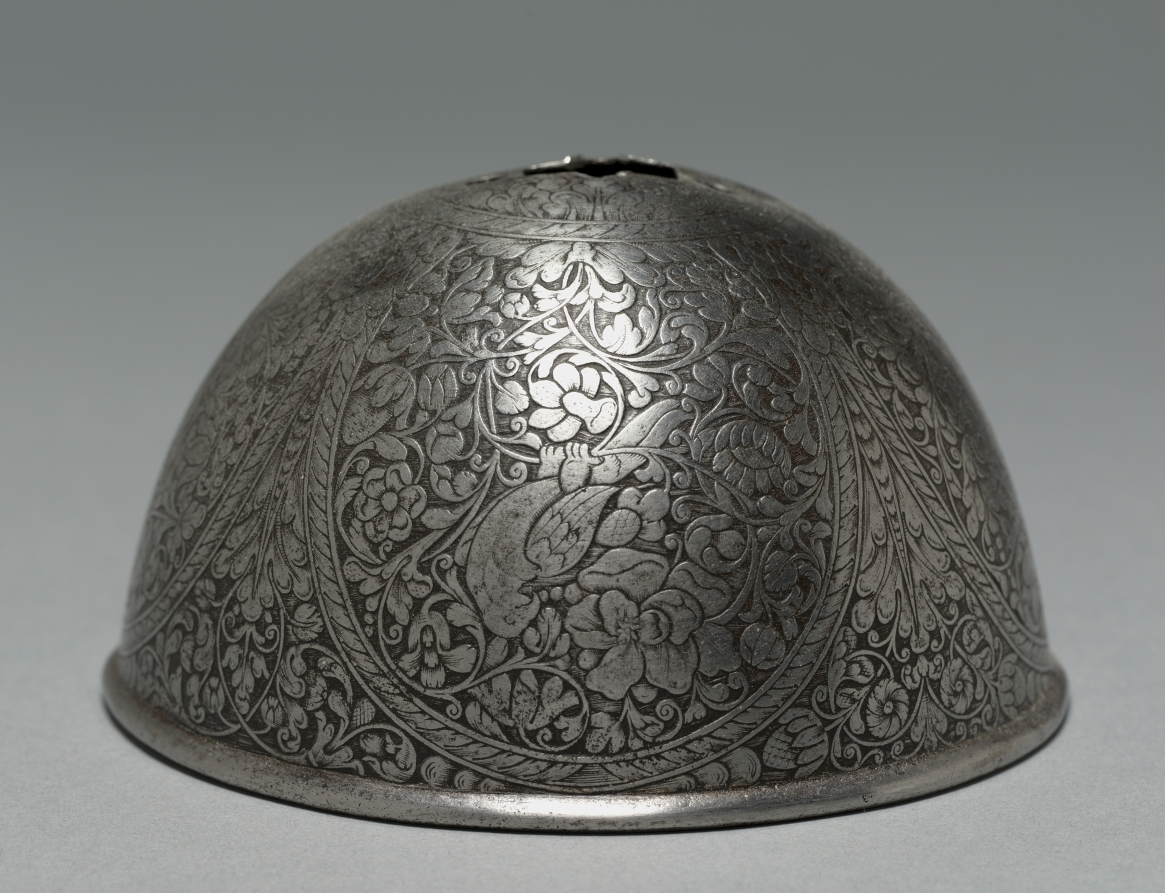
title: Cup from a Rapier's Hilt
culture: Italy, 17th century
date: c. 1650–75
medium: steel with etched floral, floiate, and bird designs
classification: Arms and Armor